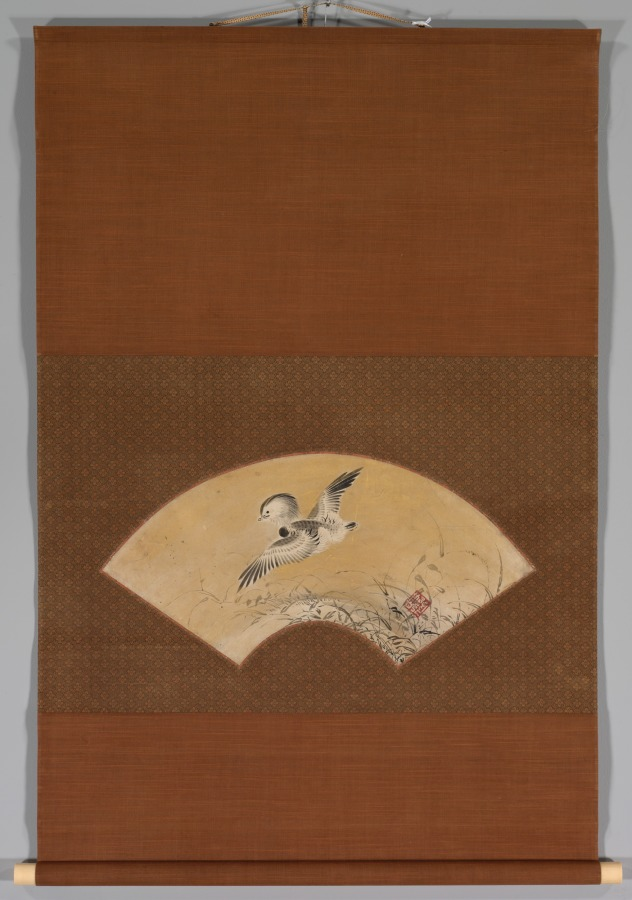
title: Duck in Flight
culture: Japan, Muromachi period (1392–1573)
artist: Shikibu Terutada (Japanese, active mid-1500s)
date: mid-1500s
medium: fan painting mounted as hanging scroll; ink and gold on paper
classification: Painting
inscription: artist's seal in lower right.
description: These three fan-shaped paintings, now mounted as individual hanging scrolls, were once part of a set of 20 mounted on a folding screen. They portray the Chinese subjects, from left to right, of the scholar-official Pan Lang, Hanshan reciting his poetry to Shide, and a duck in flight above reeds. Pan Lang grew so fond of the mountain in his place of exile that when he was ordered back to the capital, he rode backward on his donkey so he could see it until it receded into the distance. Hanshan and Shide worked in the kitchen of a Zen monastery, but were actually reincarnations of the bodhisattvas Manjushri and Samantabhadra. The combination of a mandarin duck and reeds may have signified a level of attainment in Chinese civil service exams. All three paintings bear the seal of the Kantobased artist Shikibu Terutada. Shikibu was familiar with Kano school painting, but he also modeled his early style after that of the prominent Kanto-based Kenkō Shōkei (active about 1470–after 1523).